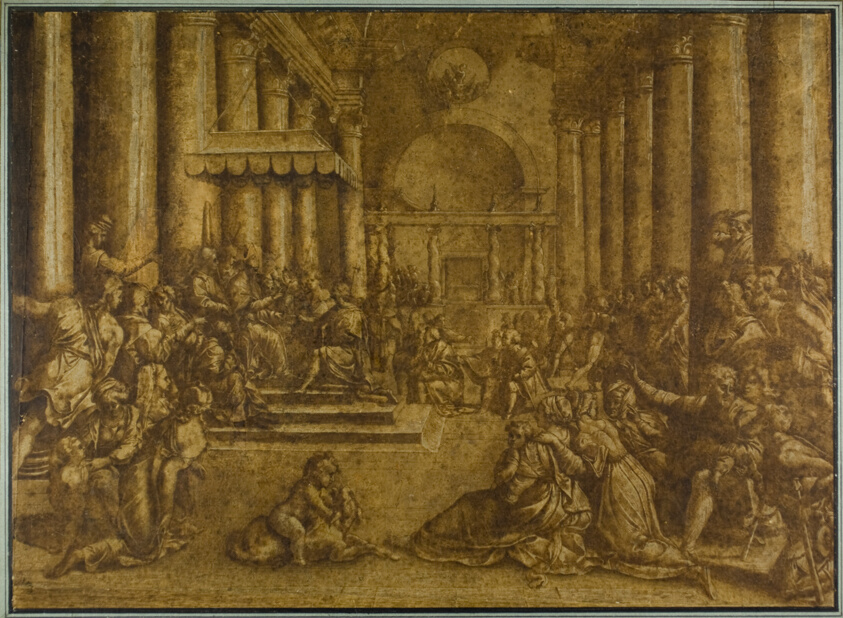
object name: Drawing and Watercolor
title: Donation of Constantine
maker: Giulio Pippi, called Giulio Romano, after; Italian, c. 1499-1546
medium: Pen and brown ink, with brush and brown wash, heightened with white gouache, on laid paper, laid down on cream laid card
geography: Italy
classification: ink with wash; drawings (visual works); prints and drawing